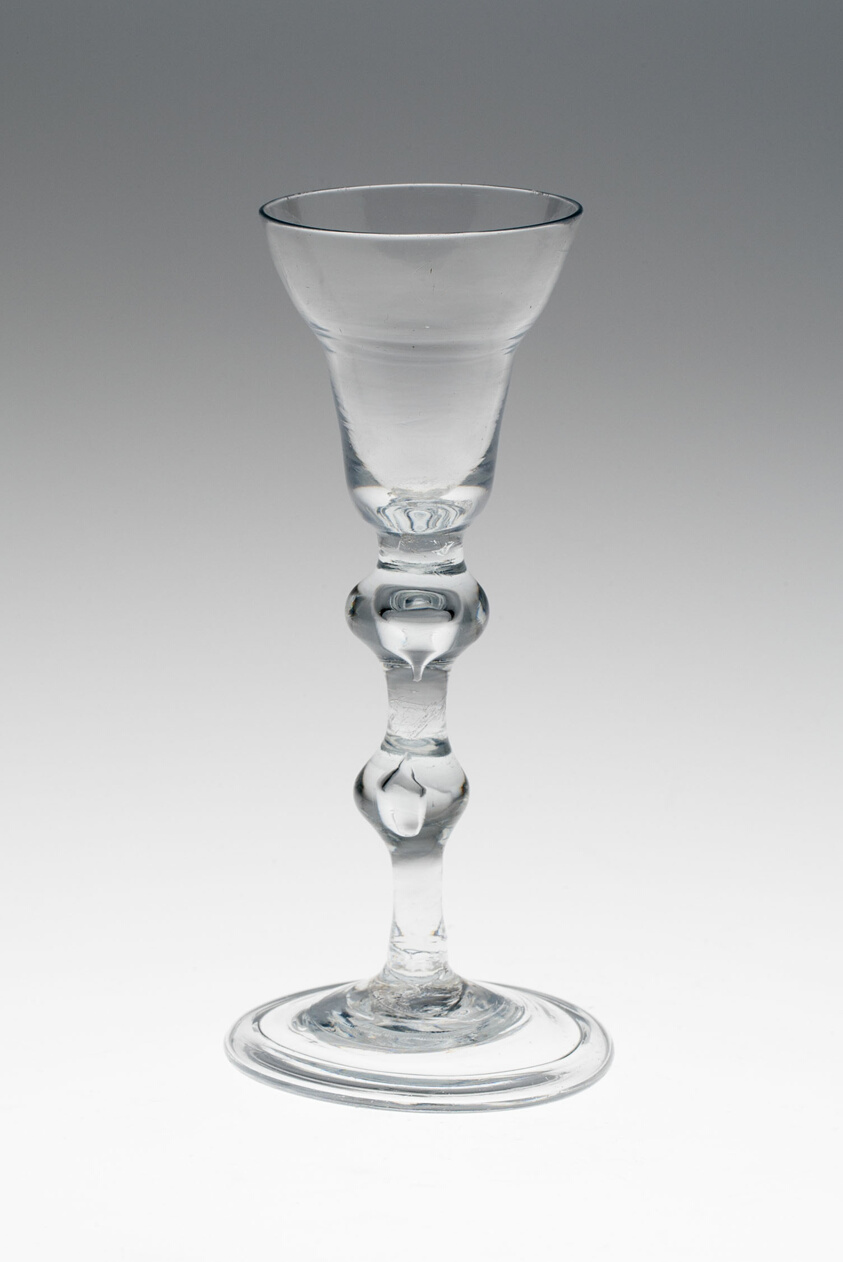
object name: Glass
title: Wine Glass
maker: England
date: c. 1750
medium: Glass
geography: England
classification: drinking vessel; glass; european decorative arts